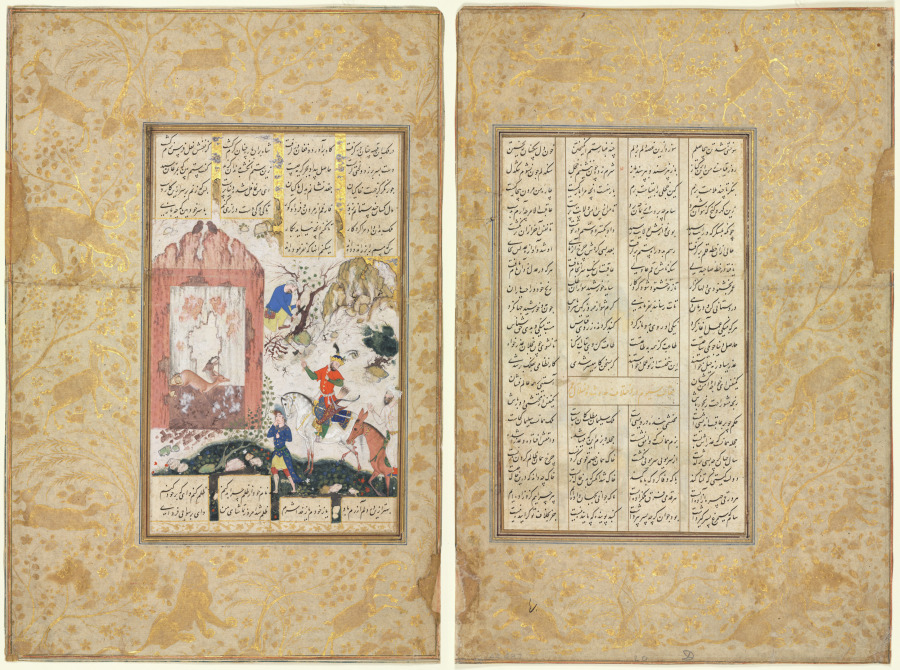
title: Nushirwan Listens to the Owls (recto); the Story of Nushirwan and his Minister, "The Third Discourse on Diverse Events and Disorder in Life" (verso) from a Khamsa (Quintet) of Nizami (1141–1209)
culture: Iran, Qazvin, Safavid period (1501-1722)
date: 1555–65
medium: opaque watercolor, ink, and gold on paper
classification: Manuscript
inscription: script: Nasta'liq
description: This scene is from the Makhzan al-Ashrar, the first of the Quintet. Although more historically oriented than the following poems, it served more as a vehicle for moralizing tales than for historical events. In this scene Nushirwan asks the sage Buzurgmihr to explain what the owls perched on a ruined building are saying. He explains that one owl is offering the other as many ruined cities as he likes in exchange for his daughter's hand. He thus reproves Nushirwan for his love of conquest and war and the consequent destruction of many cities.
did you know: King Nushirwan is on a white horse, while his minister Buzurjmihr is riding a mule.